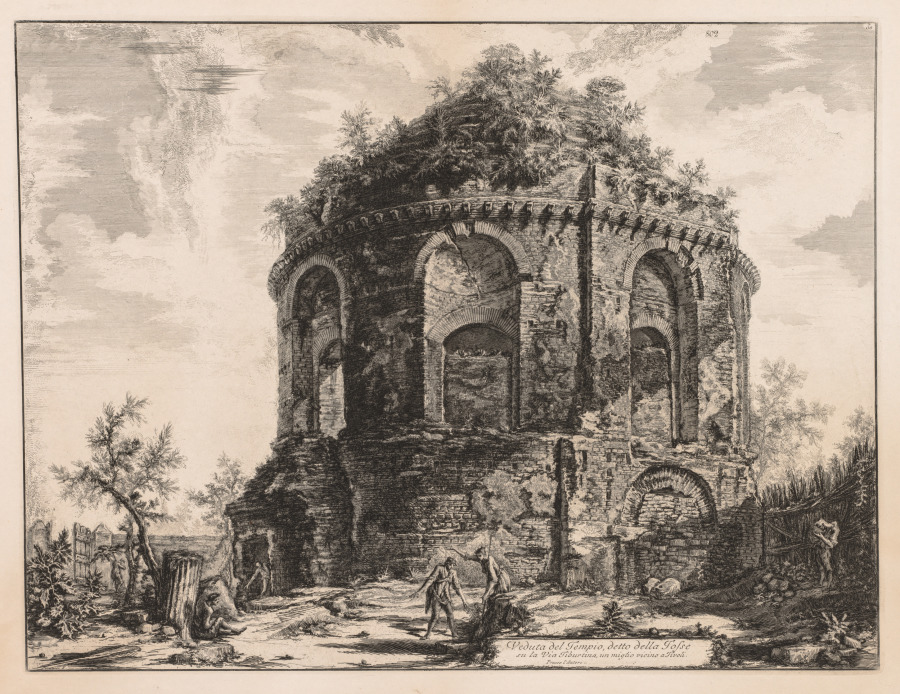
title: Views of Rome: The So-called Tempio della Tosse, near Tivoli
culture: Italy, 18th century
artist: Giovanni Battista Piranesi (Italian, 1720–1778)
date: 1763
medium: etching and engraving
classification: Print